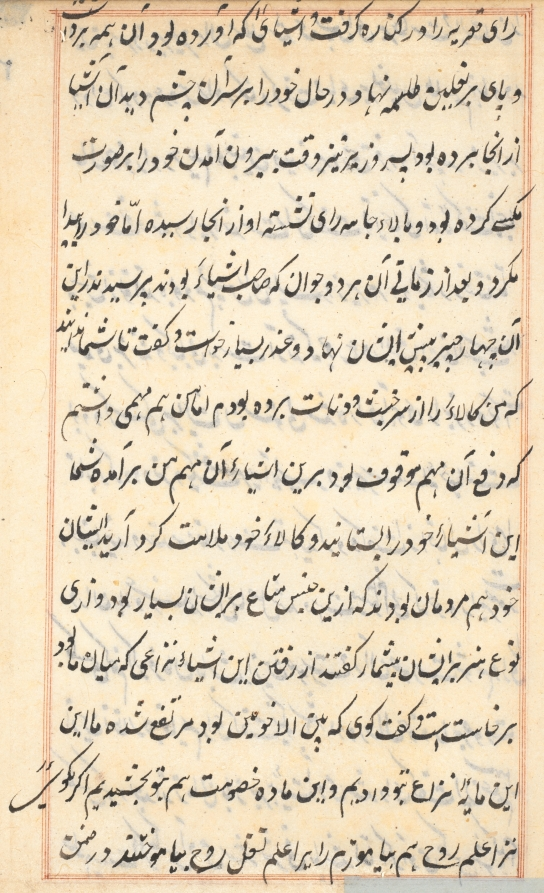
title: Page from Tales of a Parrot (Tuti-nama): text page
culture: Mughal India, court of Akbar (reigned 1556–1605)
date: c. 1560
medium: gum tempera, ink, and gold on paper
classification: Painting